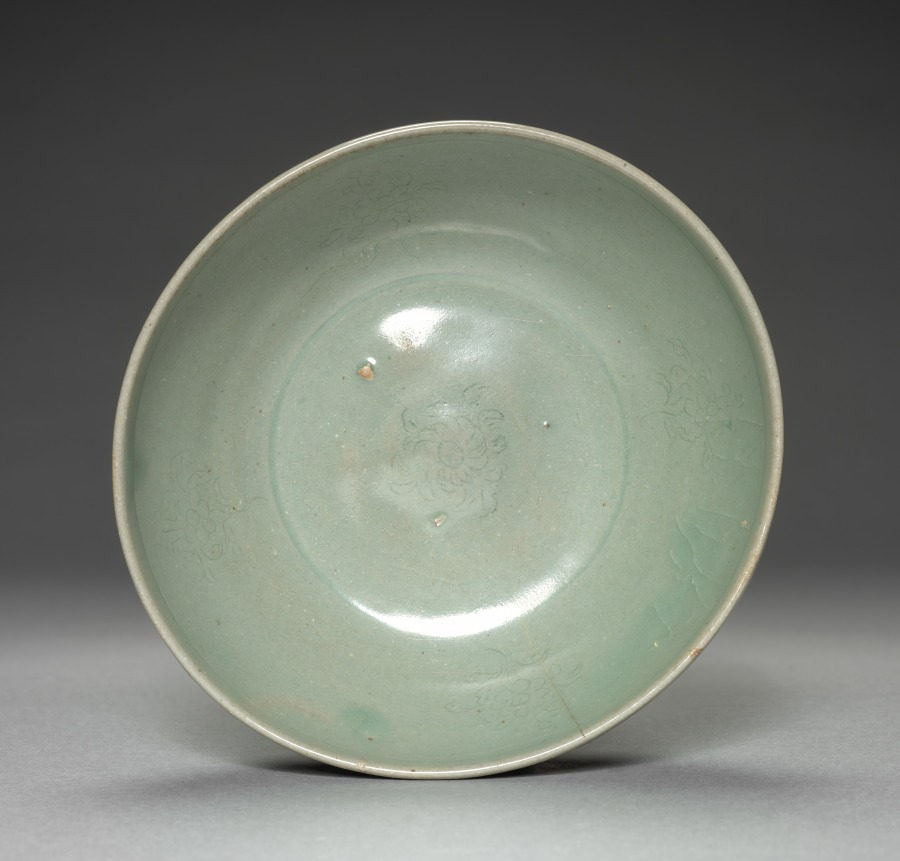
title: Dish with Incised Floral Design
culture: Korea, Goryeo dynasty (918–1392)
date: 1100s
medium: glazed porcelain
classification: Ceramic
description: Celadon wares used for everyday such as this dish were among the most common burial objects in tombs during the Goryeo period (918–1392). Furnishing tombs with an elaborate assemblage of objects was believed to honor and comfort the newly dead. Generally, Goryeo tombs were left untouched until the late 1800s. During the colonial period (1910–45), however, Japanese archaeologists competitively excavated the tombs located in Kaeseong, the former capital of the Goryeo period, and these wares soon became available for Japanese and Western collectors.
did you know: The translucent greenish and bluish glaze of Goryeo celadons, shown in this vase, is the result of distinctive small and long Korean kilns, which maintained a low oxygen saturation with a high level of carbon dioxide.